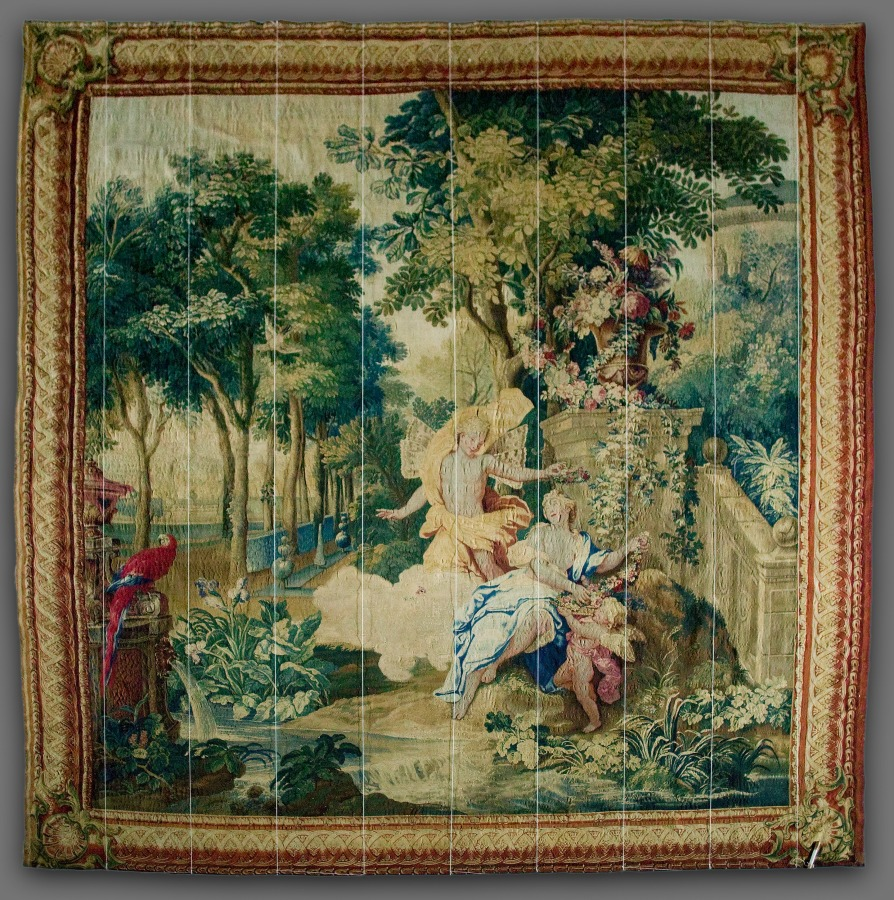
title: Set of Ovid's Metamorphoses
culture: France, 18th century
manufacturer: Gobelins Manufactory (France, Paris, est. 1662)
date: 1704–31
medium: tapestry weave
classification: Tapestry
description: Each tapestry illustrates a scene from Metamorphoses, written by the ancient Roman poet Ovid. The poem is comprised of fifteen books and contains more than 250 myths. These tapestries were produced in Paris by the royal Gobelins Manufactory during the 1700s. Gobelins was founded in 1662 for the purpose of furnishing French royal homes with the highest quality textiles. Gold and silver thread and silk were woven together to create luxurious tapestries like these.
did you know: During the French Revolution, Gobelins tapestries were sometimes disassembled to harvest the gold threads.